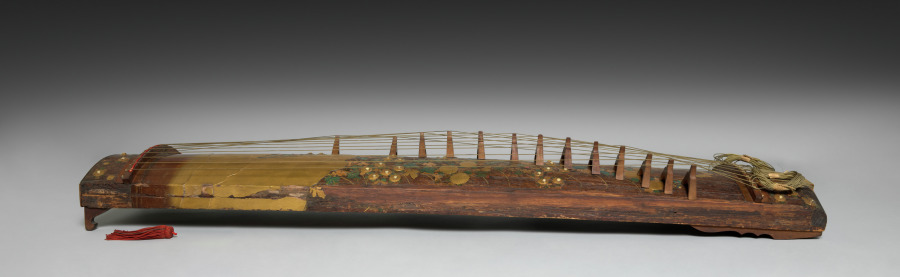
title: Koto (Zither)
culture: Japan, Edo period (1615–1868)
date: early to mid-1800s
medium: Wood with colored lacquer, sprinkled gold powder (maki-e), textile, and silk strings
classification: Musical Instrument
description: This koto has an elaborately decorated surface, suggesting that it was meant to be admired as a decorative object rather than played as a musical instrument. The vertical design shows a profusion of chrysanthemum flowers and miscanthus grass above a brushwood fence as well as a pair of butterflies.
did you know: The koto descended from the guzheng, a Chinese zither first imported to Japan in the seventh century.